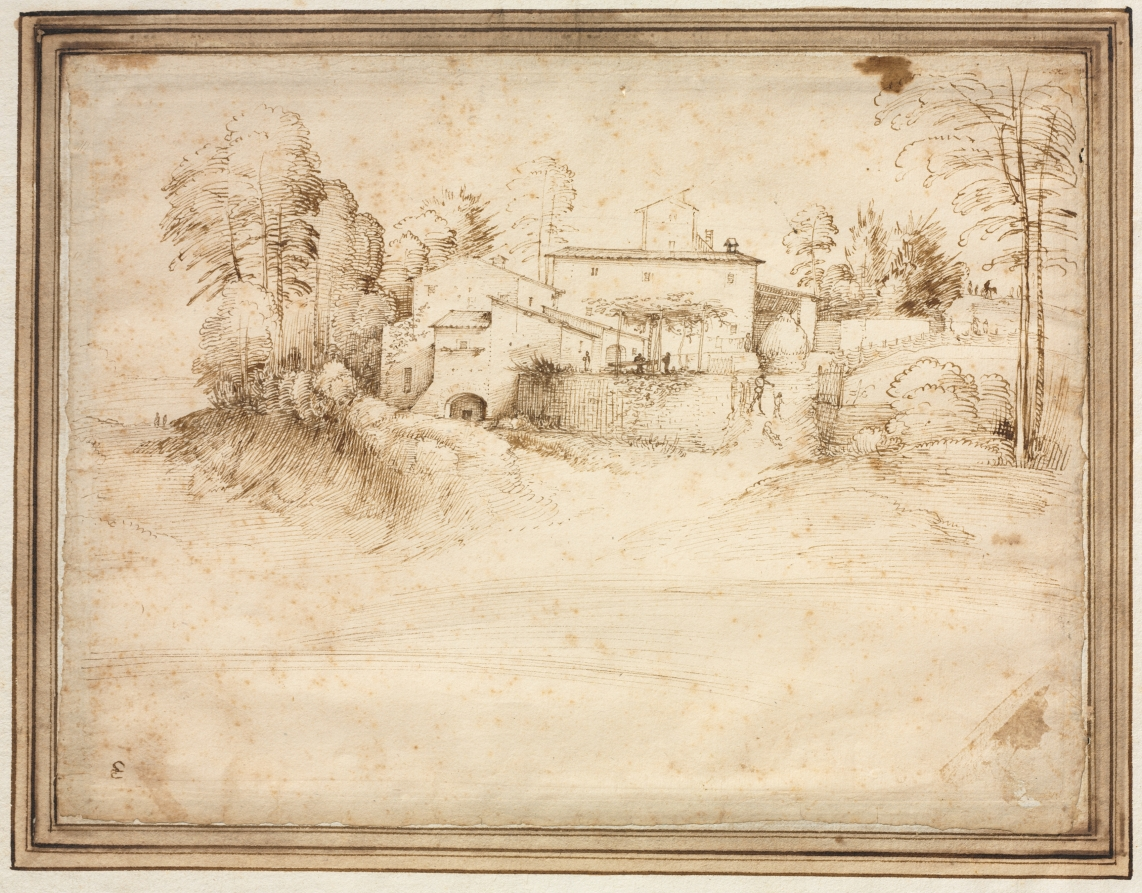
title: Farmhouse on the Slope of a Hill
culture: Italy, Florence, 15th century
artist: Fra Bartolommeo (Italian, 1472–1517)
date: c. 1508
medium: pen and brown ink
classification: Drawing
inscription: a bird in ink lower left recto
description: This is a significant early example of pure landscape drawing in Europe, as it is dedicated completely to the depiction of nature for its own sake, without suggestion of a biblical or historical narrative. The rapidity and regularity of strokes used for the evergreen and deciduous trees and the sweeping lines in the foreground suggest that the landscape in Farmhouse on the Slope of a Hill was made directly from nature. The sheet comes from an album of 41 landscape studies by Fra Bartolommeo assembled by an eighteenth-century collector and disbound for sale in the mid-20th century. A member of the Dominican Order, Fra Bartolomeo likely produced these drawings during his travels in and around Florence, often to Dominican establishments.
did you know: The artist who made this drawing, Fra (brother) Bartolommeo, left his successful Florentine artistic studio in 1500 and renounced painting in order to join the Dominican Order.